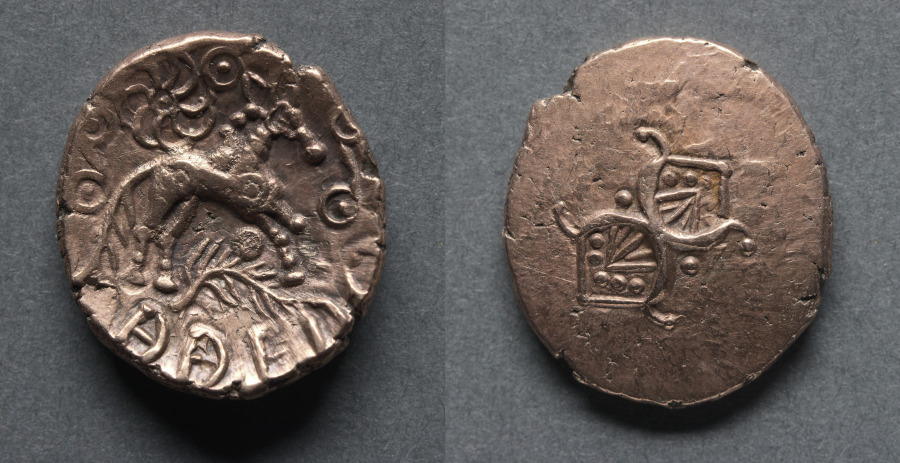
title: Addedomaros Stater: Crescents (obverse); Horse, Branch, and Spiral Sun (reverse)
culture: England, Catuvellauni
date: 50 BCE–10 CE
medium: gold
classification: Coins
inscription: AD[D]ED O[MAROS]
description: Addedomaros was a king of the tribe of Trinovantes, whose territory comprised parts of Essex and Suffolk, with its capital at Camulodunum, now known as Colchester. As a ruler, Addedomaros is completely unknown to history and thus only exists through his coins. Julius Caesar mentions that the Trinovantes were enemies of the Catuvellauni, their tribal areas being adjacent. He also comments that they supplied him with provisions during his second landing in Britain in 54 BC, thirty-nine years before the time of Addedomaros.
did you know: Addedomarus was a king of southeastern Britain and his name is known only from his inscribed coins.